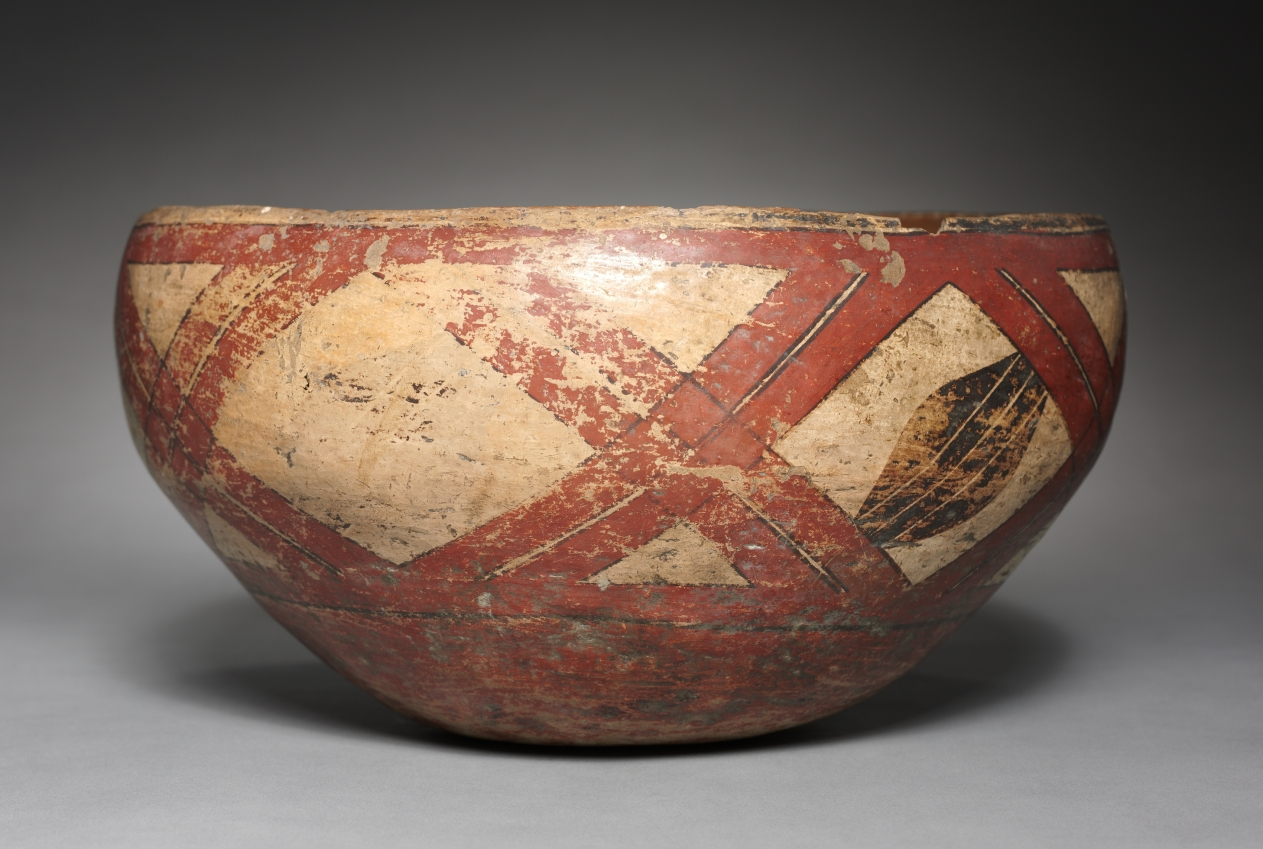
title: Stew Bowl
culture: Southwest,Pueblo, Acoma, Post-Contact Period, 20th century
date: 1860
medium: ceramic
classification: Ceramic